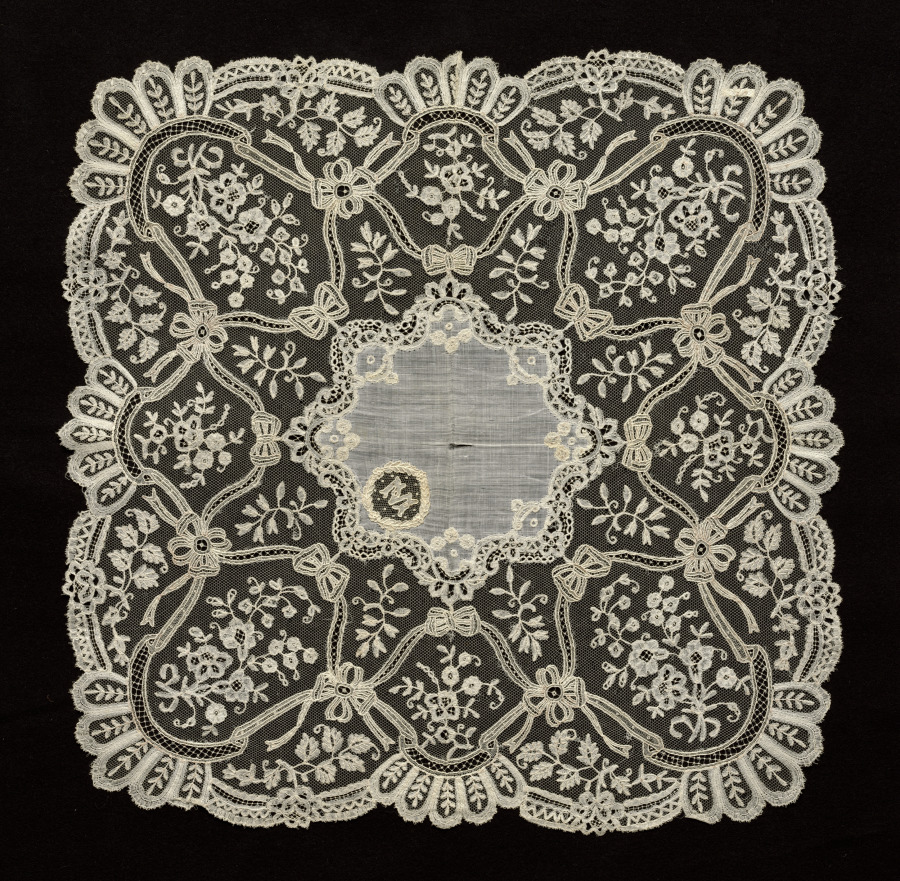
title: Lace Handkerchief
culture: Flanders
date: 1800s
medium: Plain weave linen center; bobbin lace (appliqué) on net border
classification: Lace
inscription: letter "M" in needlepoint in one corner.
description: The letter M in needle lace is inset into one corner of this handkerchief.